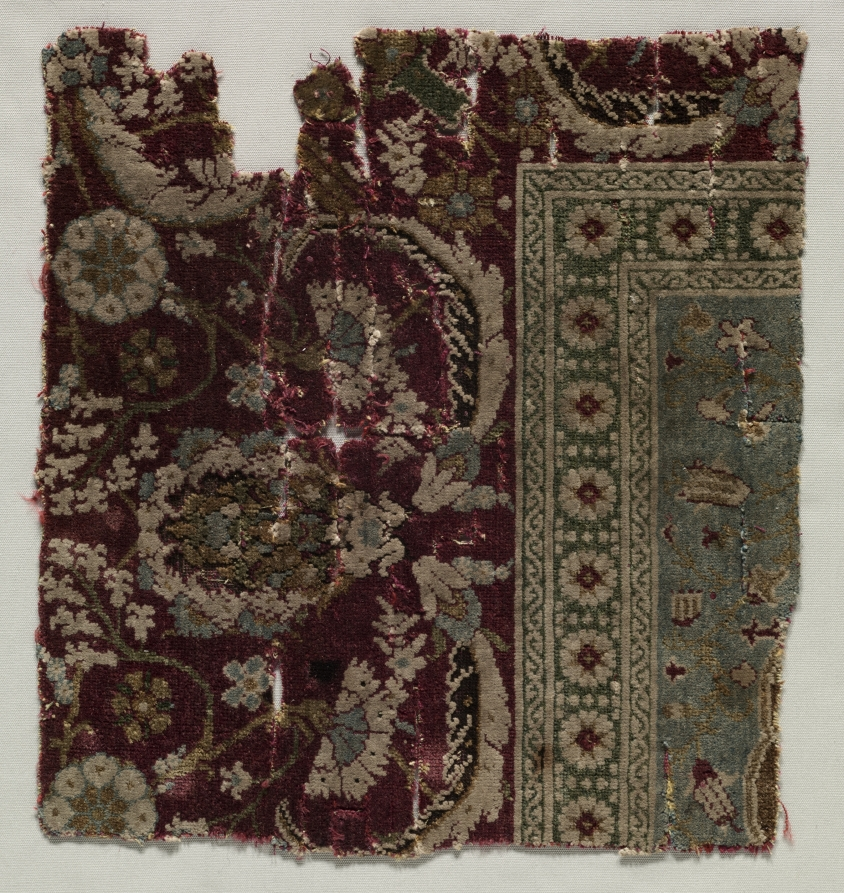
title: Fragment of a Carpet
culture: Turkey, Bursa or Istanbul, 16th century (?)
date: 16th century (?)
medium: senna knot: wool and silk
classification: Carpet